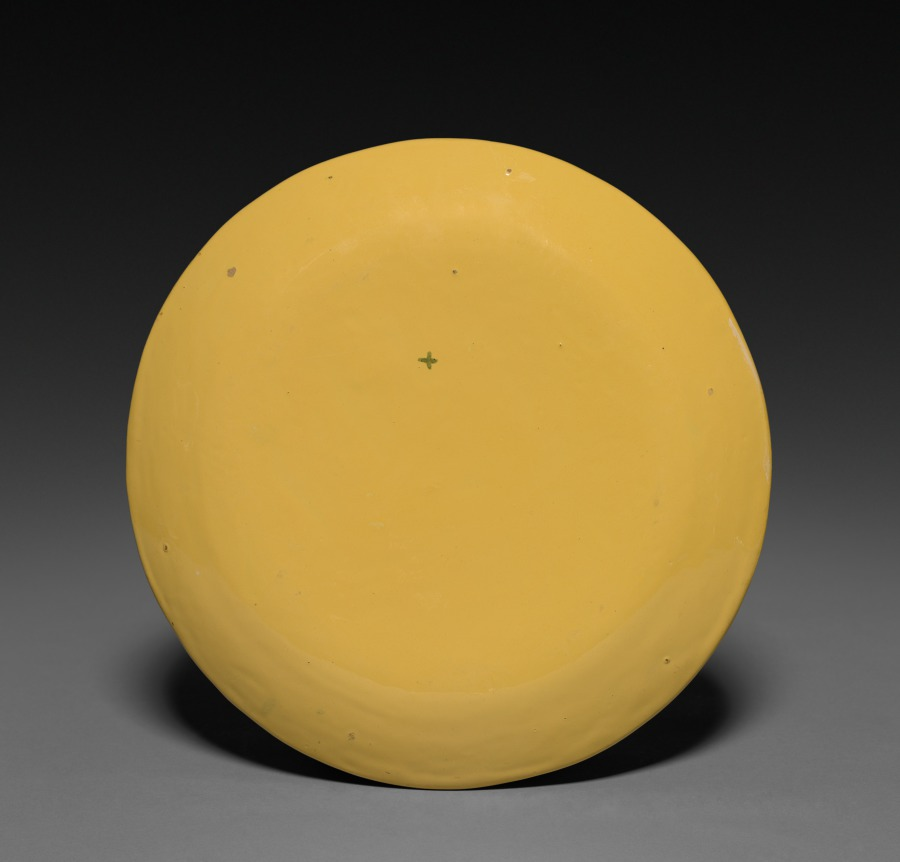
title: Plate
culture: France, Moustiers, 18th century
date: c. 1770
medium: faience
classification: Ceramic